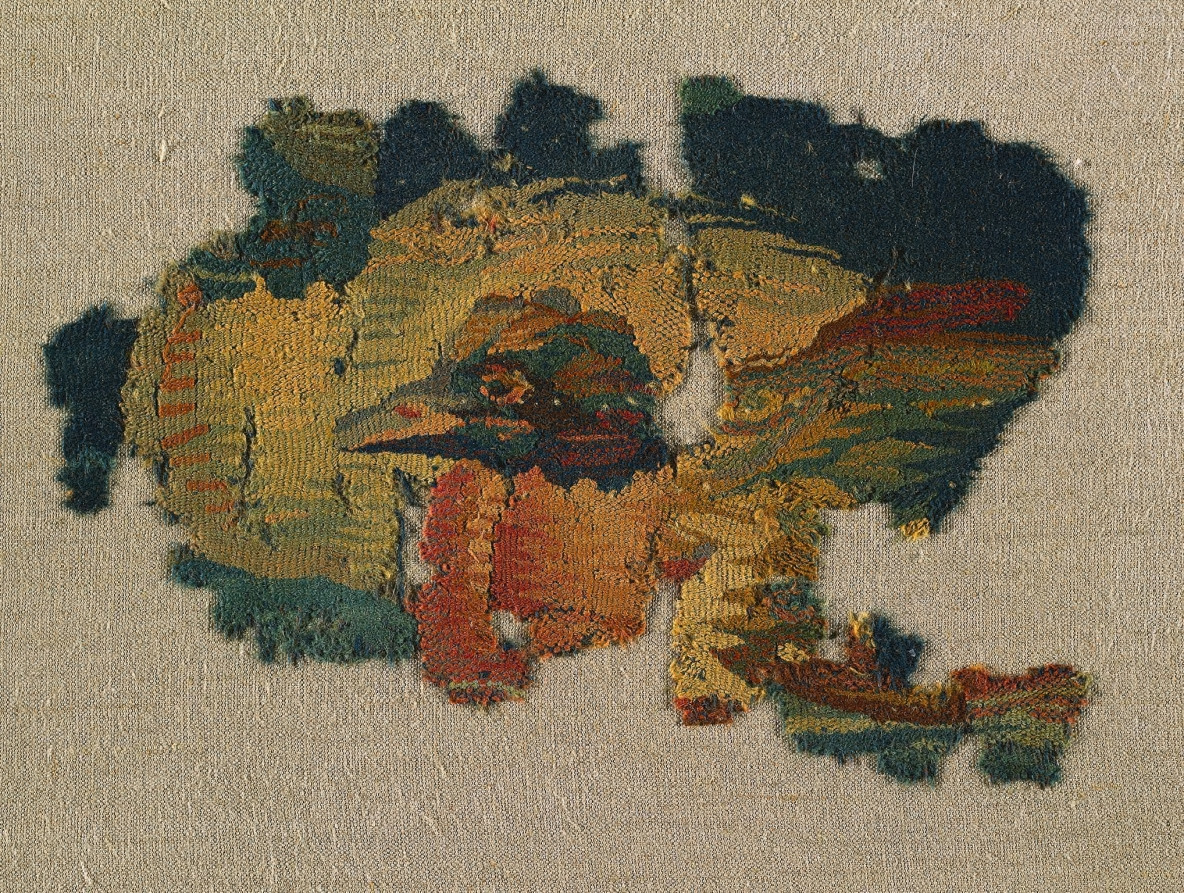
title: Duck's Head from a Large Curtain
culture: Egypt, Byzantine period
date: 200s CE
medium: tapestry weave: wool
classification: Textile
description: As creatures seen on Egypt's Nile River, ducks represent the abundance of life. The effects of shading and modeling are visible in the duck's head, which stands out against a background of sparkling water. The image is rendered in tapestry weave with wool dyed distinctive colors, several of which are combined, such as blue and red, and coral and blue-green on the right side, as if painted with dyed threads. While not common, scenes of aquatic life inspired by the Nile were celebrated in Coptic textiles. Typical of luxury curtains and hangings, the fragment is woven entirely with wool.